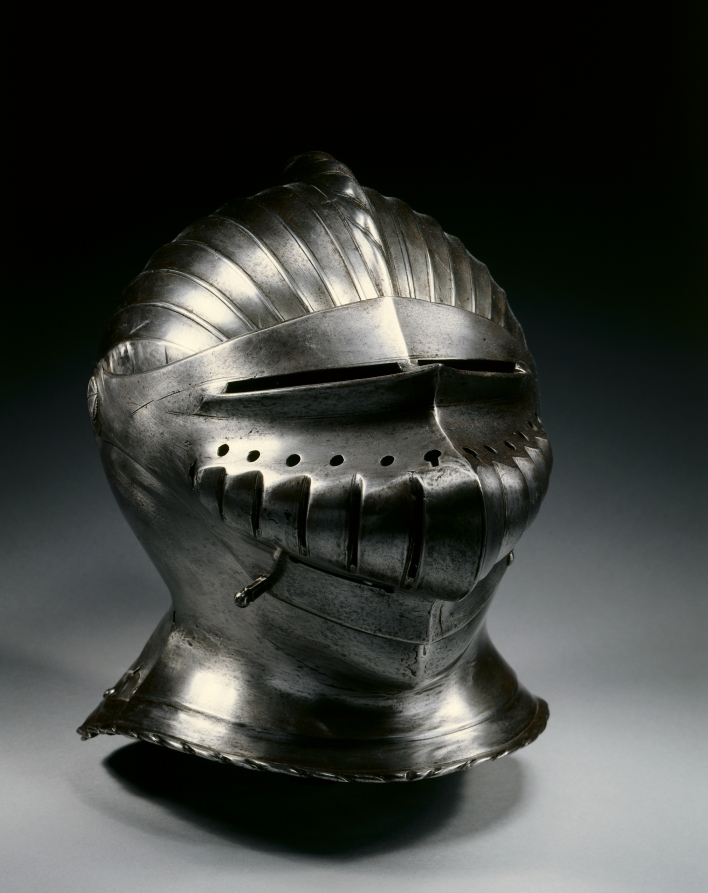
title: Close Helmet in Maximilian Style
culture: Germany, Nuremberg(?), 16th century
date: c. 1510–30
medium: steel, brass rivets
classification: Arms and Armor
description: Distinguished by its regularly fluted surfaces, armor in this style was popularized in South Germany during the early 1500s. The style is usually called "Maximilian," as it was introduced during the reign of Emperor Maximilian I (1493-1519). The style reflects male costume of the period and the shift to the new rounded forms of the Renaissance. Other examples of this armor style may be seen nearby.